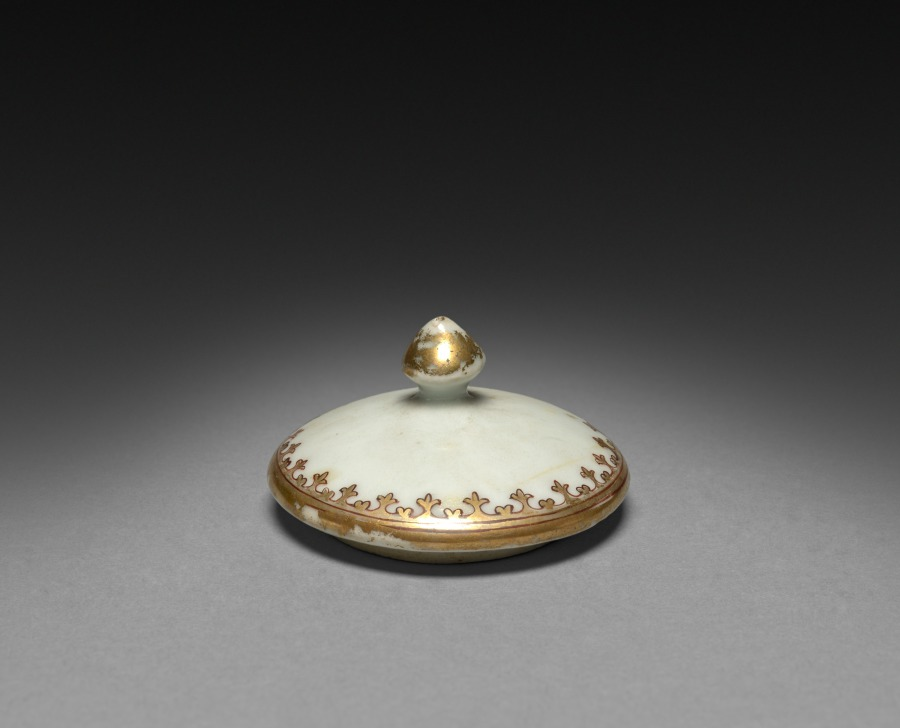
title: Milk Jug Cover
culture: China, Chinese Export, 18th century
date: 1749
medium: porcelain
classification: Ceramic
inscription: "TER GEDAGHTENIS VAN HARMANNUS LAURENTS DISCHER HOOFT VAN COMMISSARISSEN EN PRAUW VOERDERS OP BATAVIA A° 1749" (In memory of Hermann Laurents Discher Head of the Commissioners and "Prauw" [boat] Traders of Batavia, 1749).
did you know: Milk jugs with lids or covers usually held warm milk for coffee or tea.